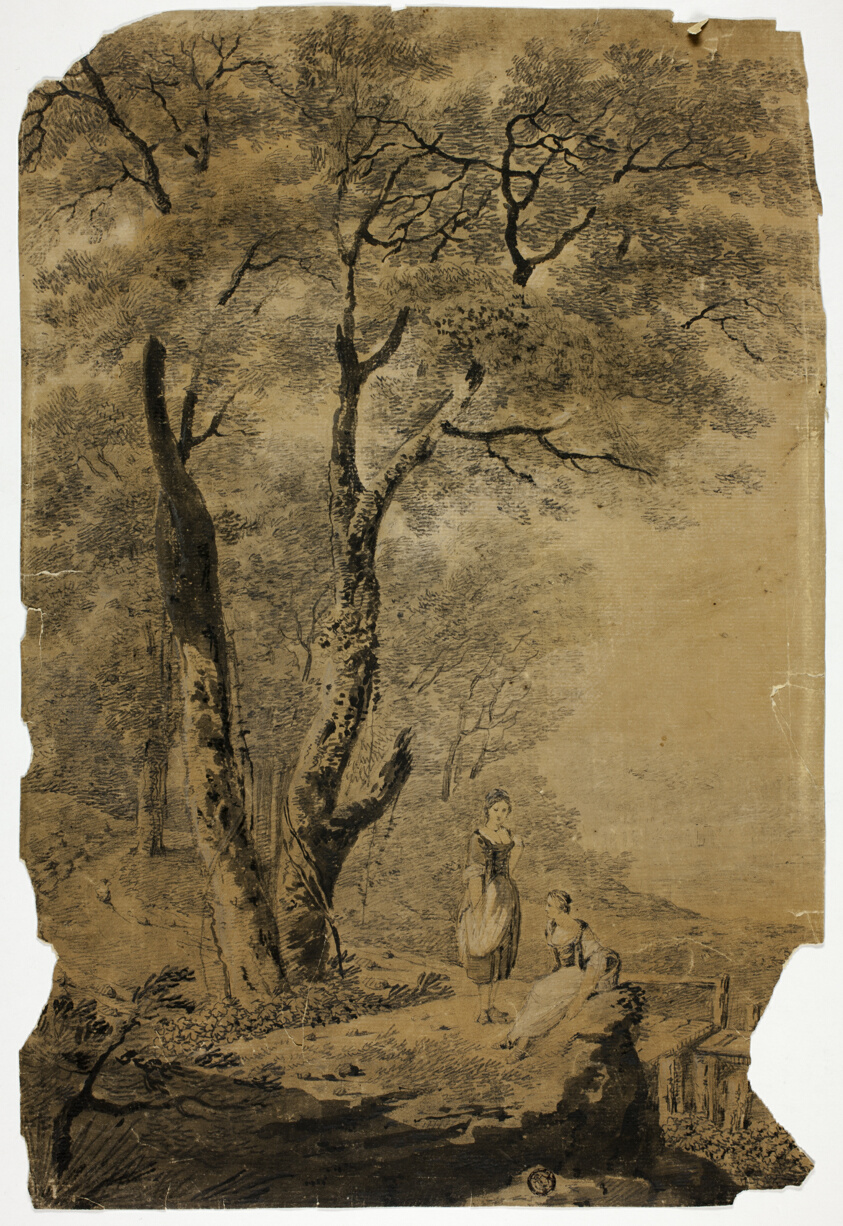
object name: Drawing and Watercolor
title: Wooded Landscape with Two Women in Foreground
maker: Attributed to or after Jean Baptiste Pillement; French, 1719/28-1808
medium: Graphite, with brush and black wash, heightened with traces of white gouache, on tan laid paper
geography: France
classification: pen and ink drawings; drawings (visual works); prints and drawing